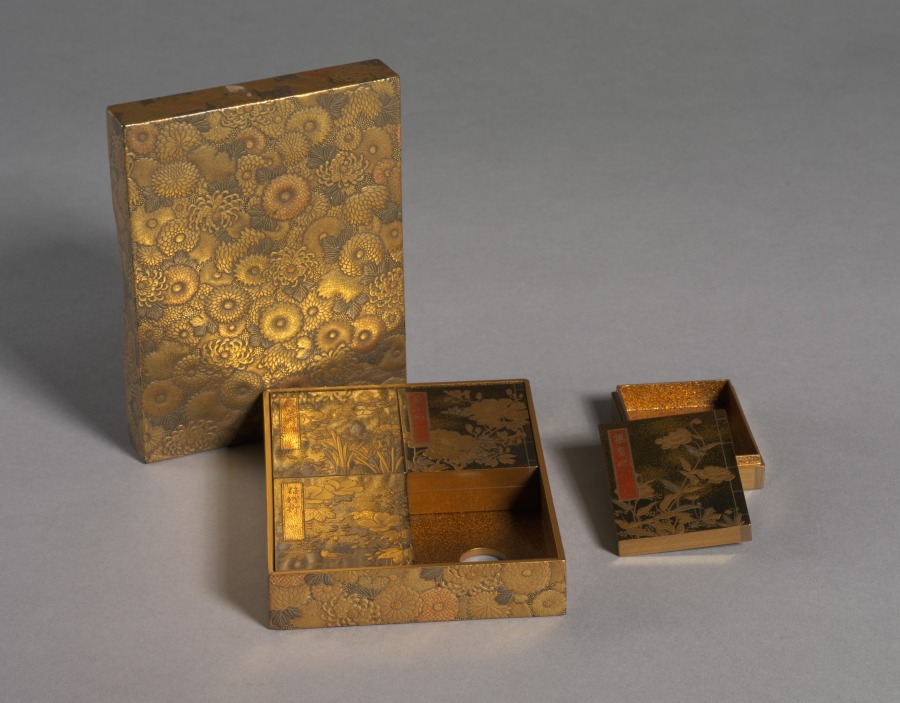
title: Nested Boxes with Chrysanthemums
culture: Japan, Meiji period (1868–1912)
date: early 1900s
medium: Set of five boxes; lacquered wood with sprinkled gold powder (maki-e)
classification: Lacquer